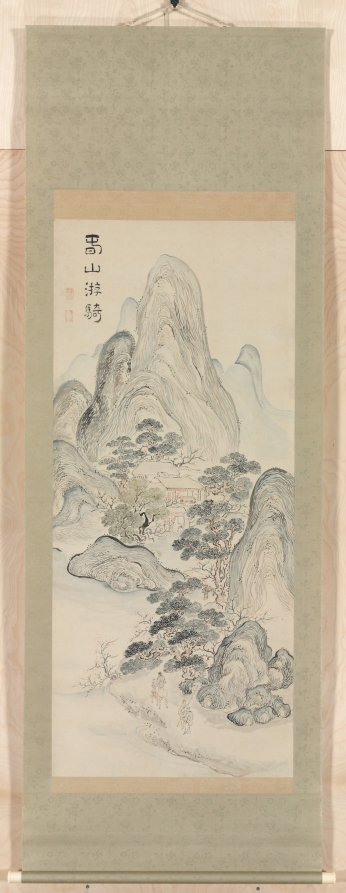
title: Spring Landscape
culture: Japan, Edo period (1615–1868)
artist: Ike Taiga (Japanese, 1723–1776)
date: 1700s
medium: hanging scroll; ink and color on paper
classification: Painting